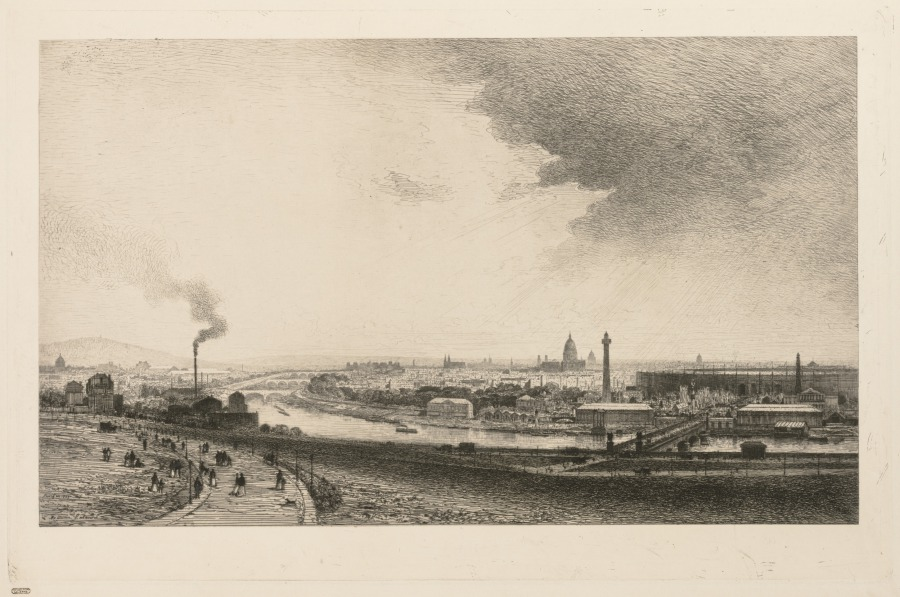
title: On the Seine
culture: France, 19th century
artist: Maxime Lalanne (French, 1827–1886)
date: 1867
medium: etching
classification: Print